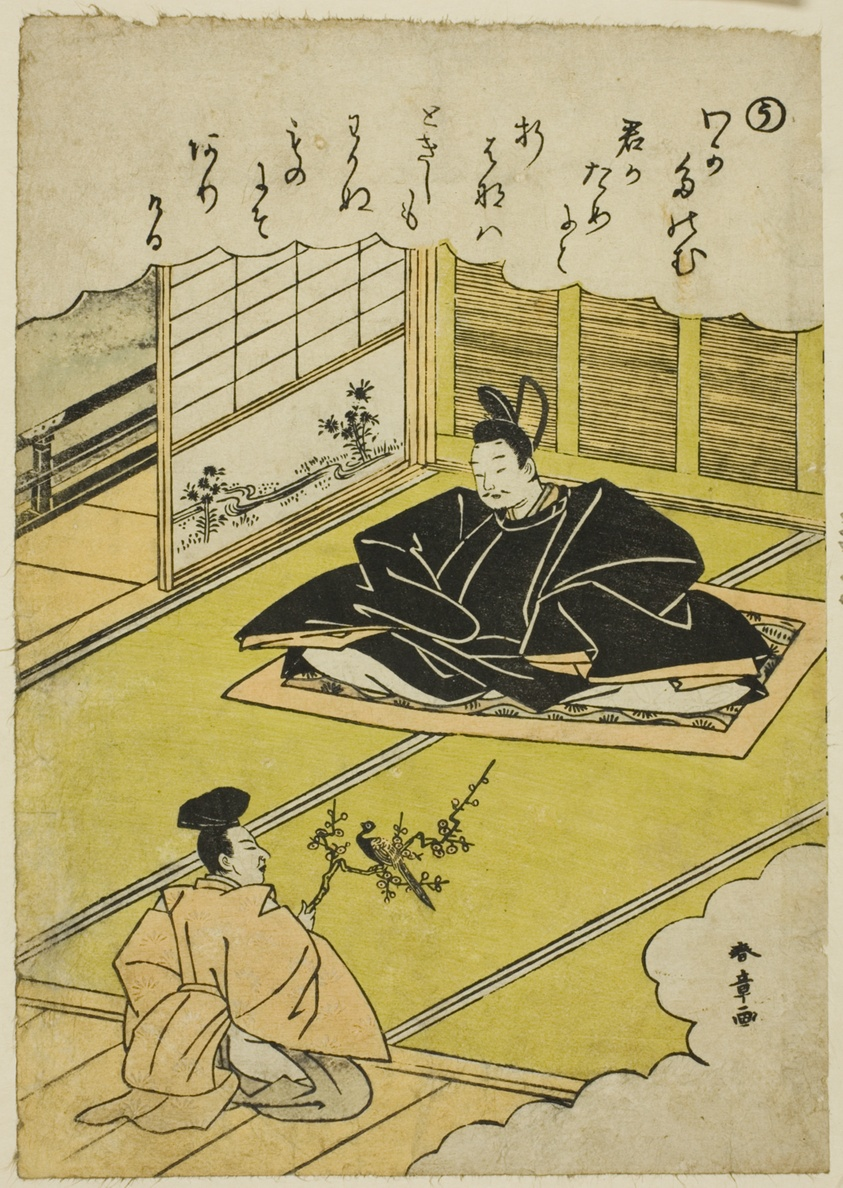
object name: Print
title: "U": Narihira Presents a Chancellor with a Model of a Pheasant, from the series "Tales of Ise in Fashionable Brocade Pictures (Furyu nishiki-e Ise monogatari)"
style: Japanese (culture or style)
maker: Katsukawa Shunsho 勝川 春章; Japanese, 1726-1792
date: c. 1772/73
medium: Color woodblock print; koban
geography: Japan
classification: woodblock print; print; asian art